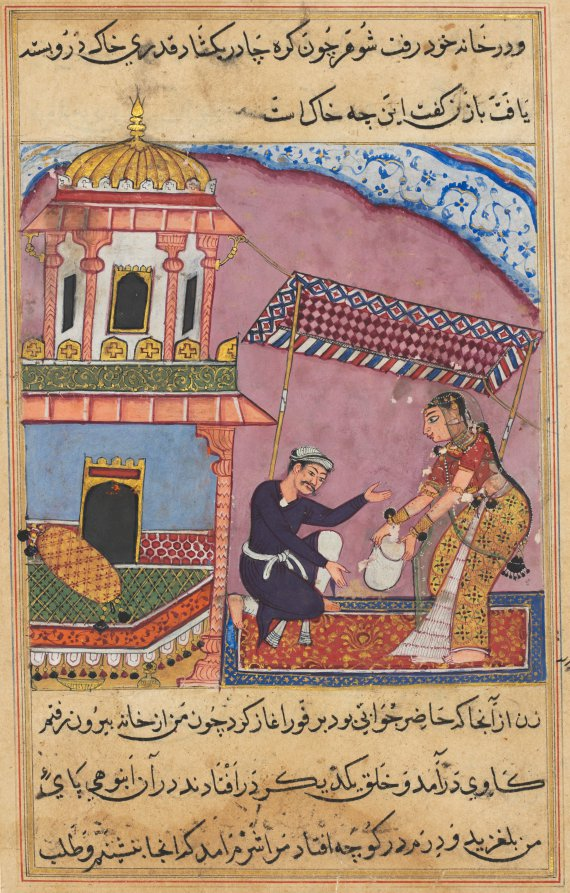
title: The husband berates his wife for purchasing gravel instead of sugar, from a Tuti-nama (Tales of a Parrot): Eighth Night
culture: Mughal India, court of Akbar (reigned 1556–1605)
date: c. 1560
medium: gum tempera, ink, and gold on paper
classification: Painting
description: After a brief romantic encounter with a merchant, an unfaithful wife returns home to discover that the merchant's clerk replaced her sugar with gravel. Her husband demanded to know why she brought him a bag of dirt. In response, the wily adulteress concocts a quick lie that he readily accepts.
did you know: The arched horizon, arabesque clouds, and mauve background are derived from earlier Indo-Persian painting traditions.